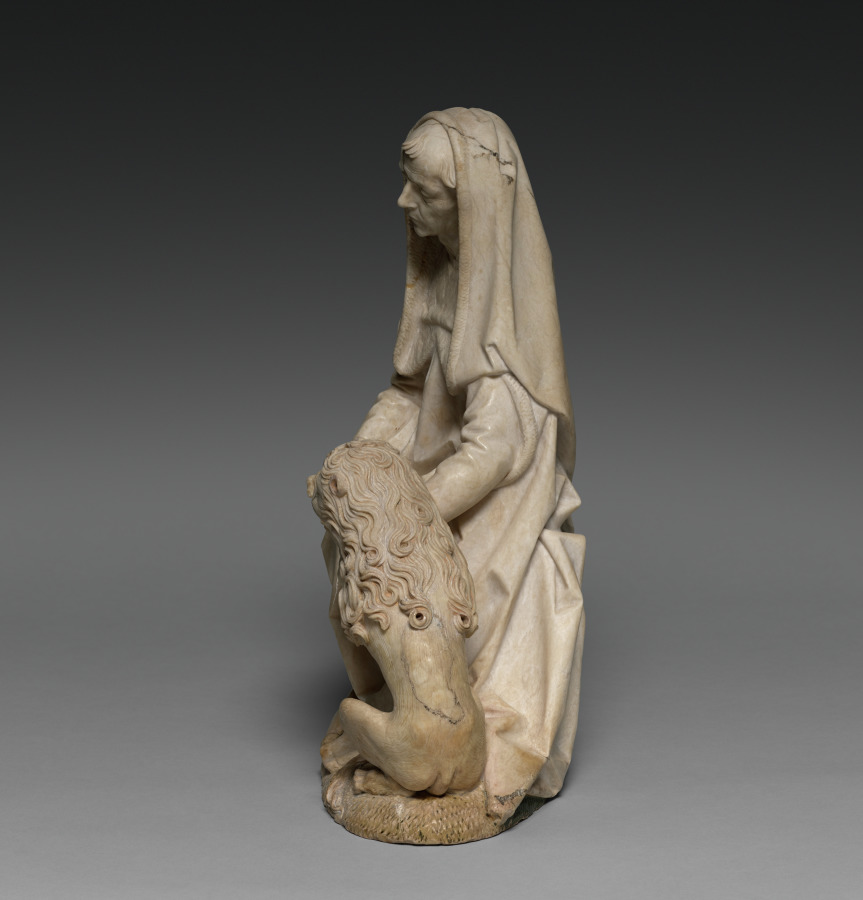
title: Saint Jerome and the Lion (From the former Church of St. Peter in Erfurt)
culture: Germany, Würzburg, late 15th Century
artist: Tilman Riemenschneider (German, active Würzburg, c. 1460–1531)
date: c. 1495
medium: alabaster, traces of polychromy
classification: Sculpture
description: According to legend, Saint Jerome (347–420 bce) lived in the desert, where he removed a thorn from an injured lion. Jerome is venerated in the Catholic Church as a Church Father, an important early author of Christianity. Here, he wears cardinal’s clothing from around 1500. Tilman Riemenschneider focused on Jerome’s relationship with the lion, creating empathy for the wounded animal. The delicacy of the depiction, which may have been partially painted to add highlights, is typical of alabaster, as is its fine polishing. The cord of the cardinal’s hat, missing today, may have been supplemented from another material.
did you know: In the story Saint Jerome encounters a fearsome lion, here depicted as diminutive, gentle, and submissive.